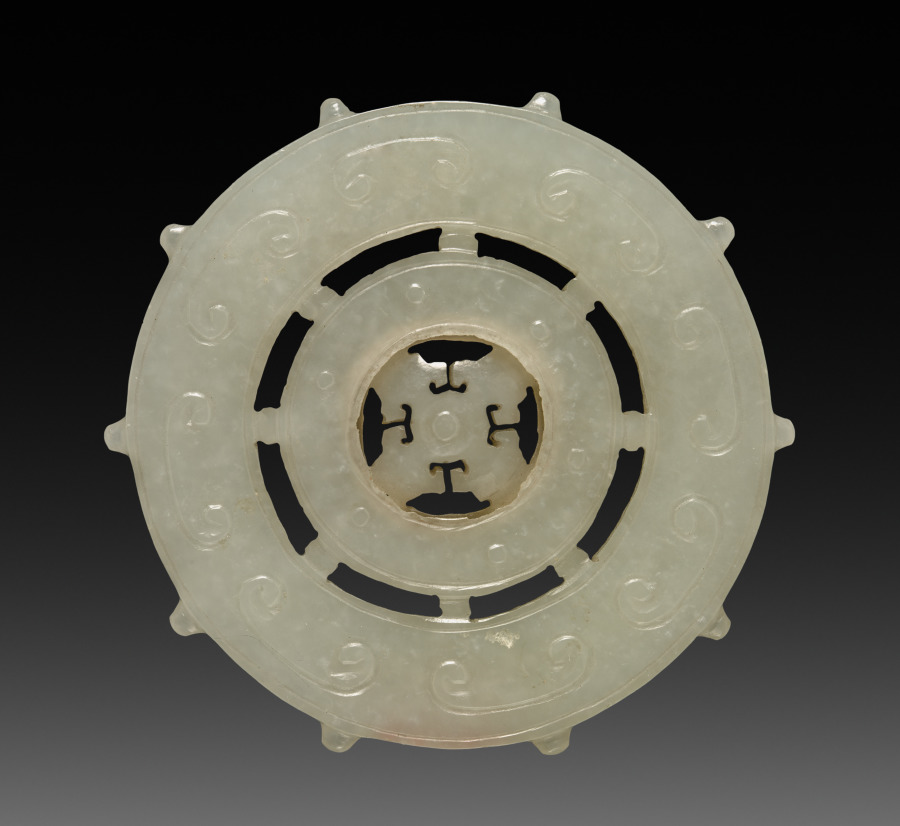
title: Ornament - Wheel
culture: China, Qing dynasty (1644–1911), Qianlong reign (1736–95)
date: 1736–95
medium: white jade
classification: Jade